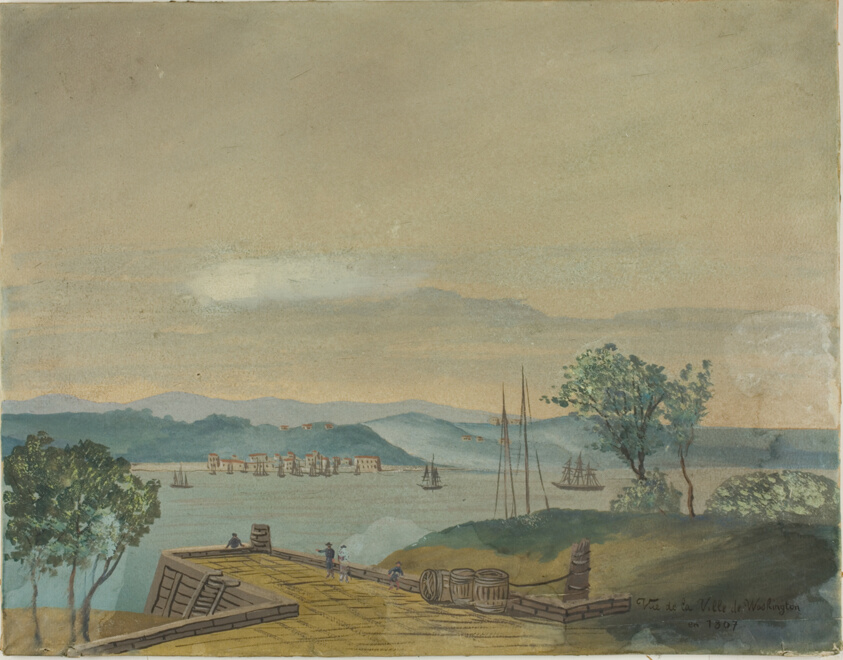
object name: Drawing and Watercolor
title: View of the City of Washington in 1807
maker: Unknown Artist; French, 19th century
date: 1807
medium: Gouache on paper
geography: France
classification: gouache; drawings (visual works); prints and drawing